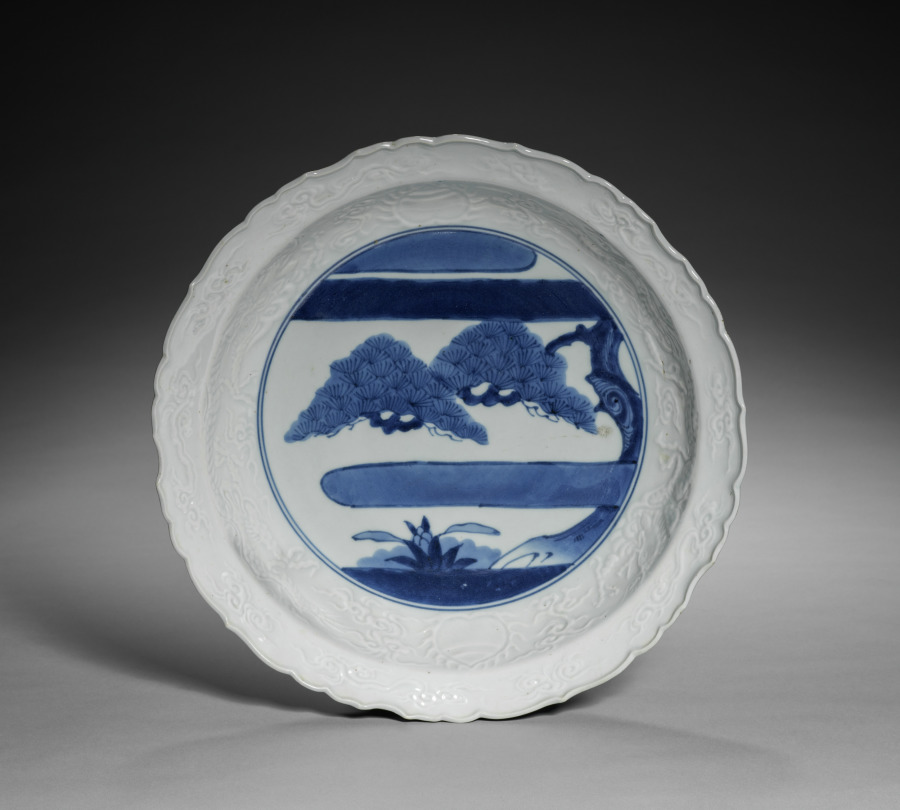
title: Large Dish with Landscape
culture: Japan, Edo period (1615–1868)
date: 1750s–80s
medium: porcelain with underglaze blue and molded decoration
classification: Ceramic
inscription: Seal on base illegible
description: The motif in the central medallion of this large dish depicts a knotted pine tree on the right with branches of pine needles forming triangular shapes resembling mountains in a distant landscape. Above and below the branches are three cloud bands in alternating light and dark washes of cobalt blue. In the foreground, a small blooming orchid reaches toward the left of the dish, balancing the gentle sway of the pine tree.